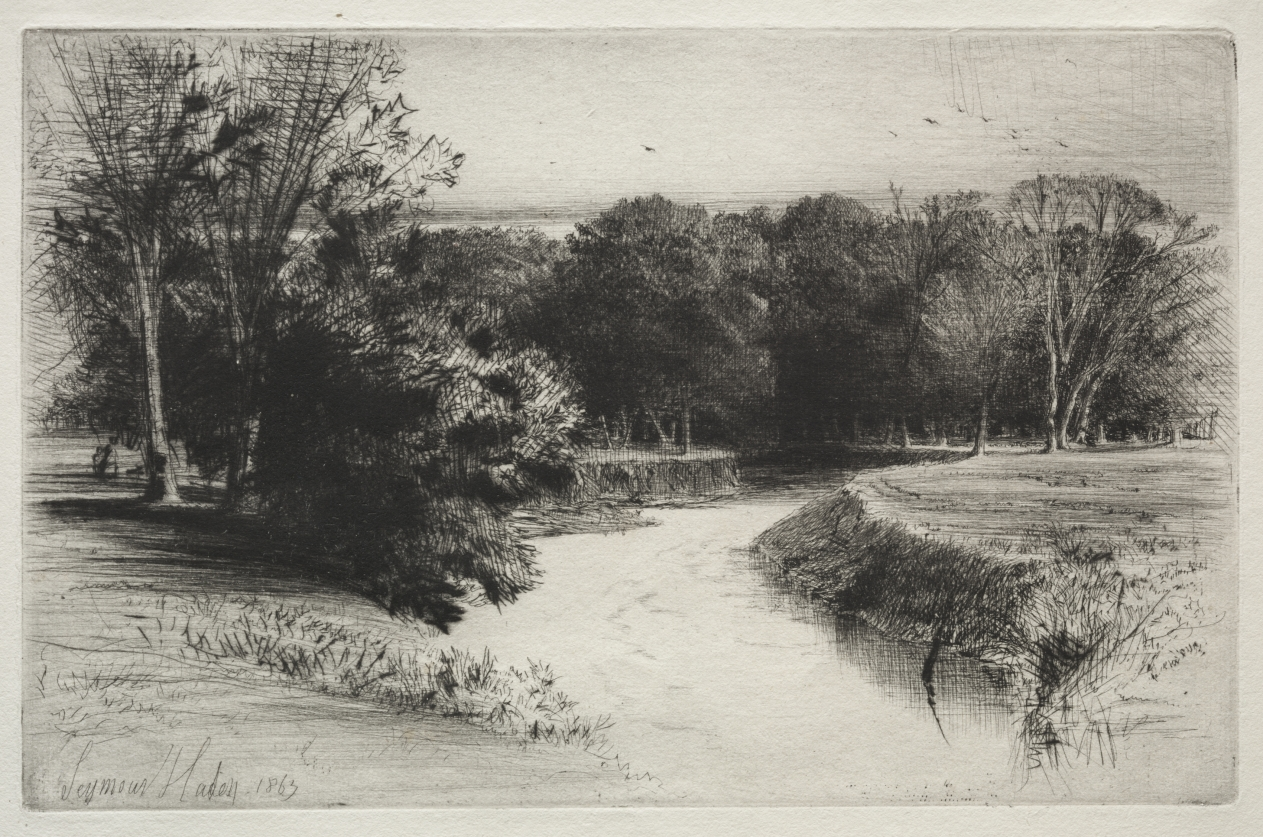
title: A Sunset in Ireland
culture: England, 19th century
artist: Francis Seymour Haden (British, 1818–1910)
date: 1863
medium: etching and drypoint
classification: Print